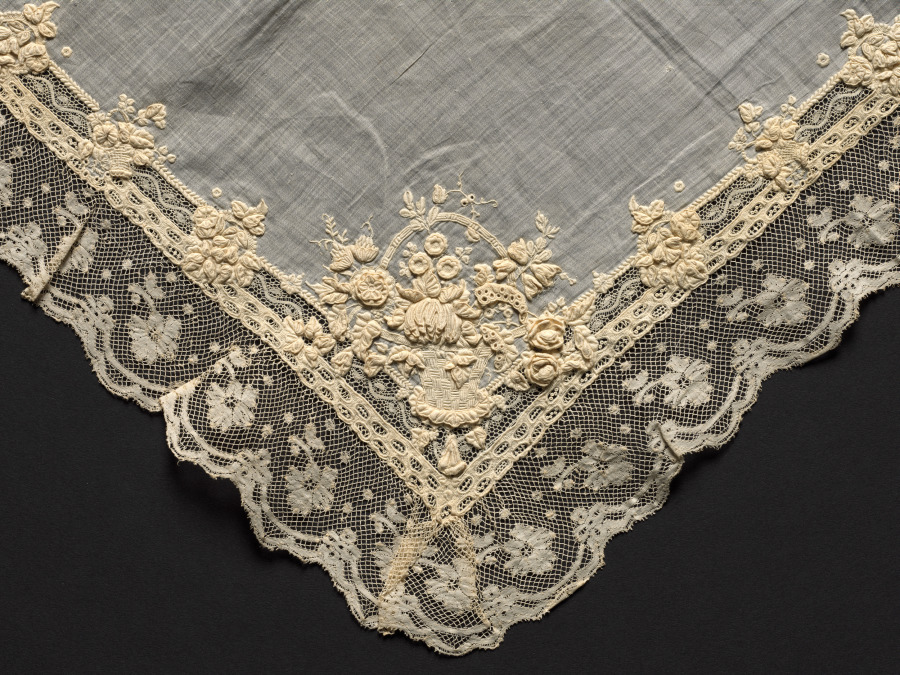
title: Lace Handkerchief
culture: Switzerland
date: 1860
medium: Plain weave linen center with bobbin lace (Valenciennes) edging and insertion and embroidery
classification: Embroidery